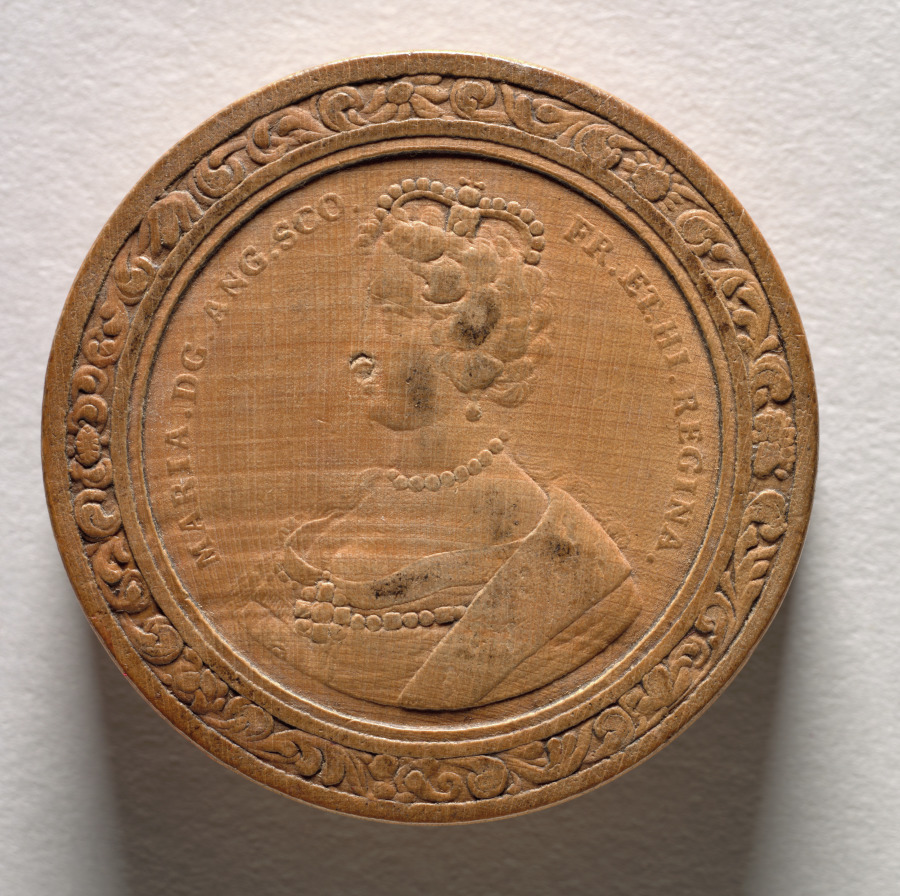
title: Gaming Piece (reverse)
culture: Germany, late 17th-early 18th Century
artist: Martin Brunner (German, 1659–1725)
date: c.1700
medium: wood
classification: Furniture and woodwork